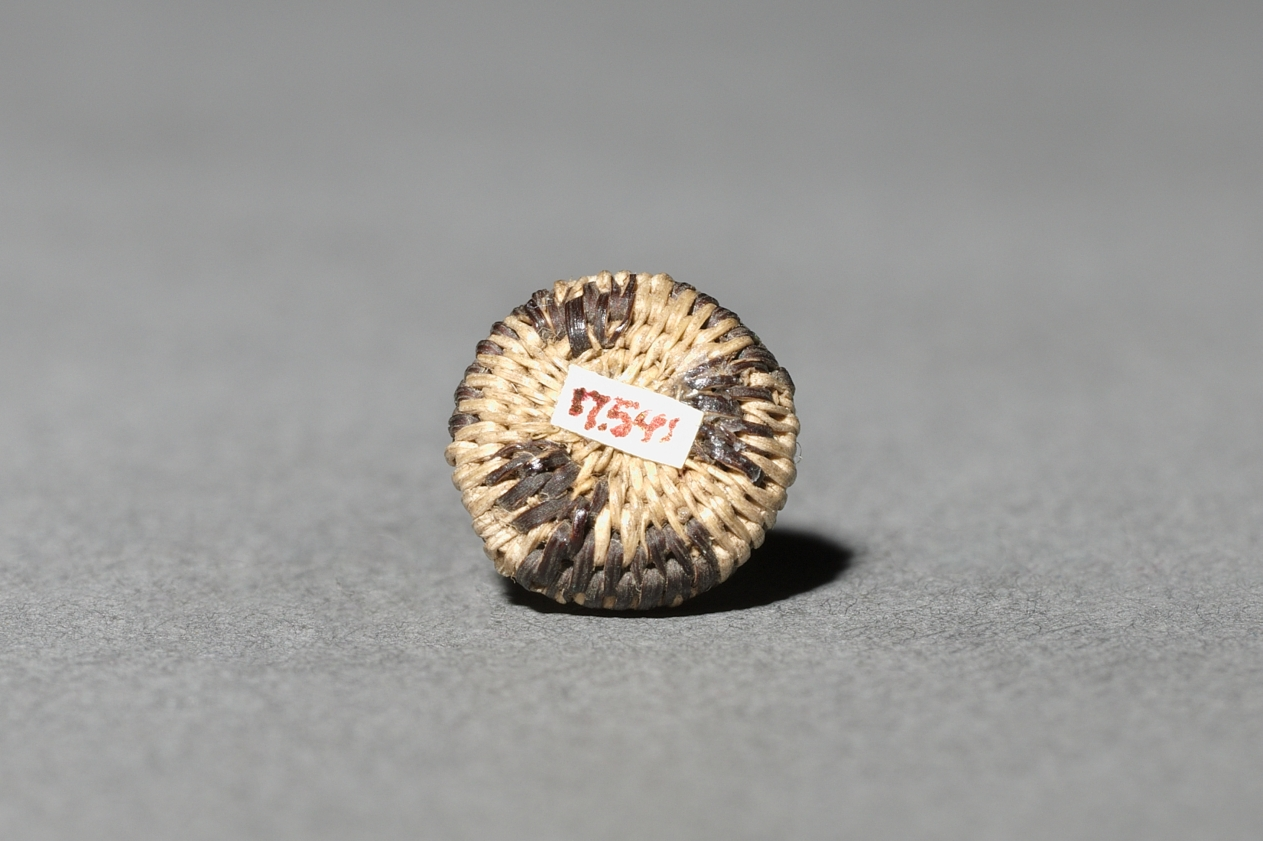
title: Miniature Round Basket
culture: California, Pomo, 20th century (?)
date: early 1900s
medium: coiled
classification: Basketry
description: Miniature baskets were made to demonstrate the basket maker’s virtuoso skill; these tiny marvels seem to be no exception—the smallest are just a few millimeters wide but still patterned. Such fine work required dexterity both in weaving and in harvesting and preparing the plant materials used to create the basket.